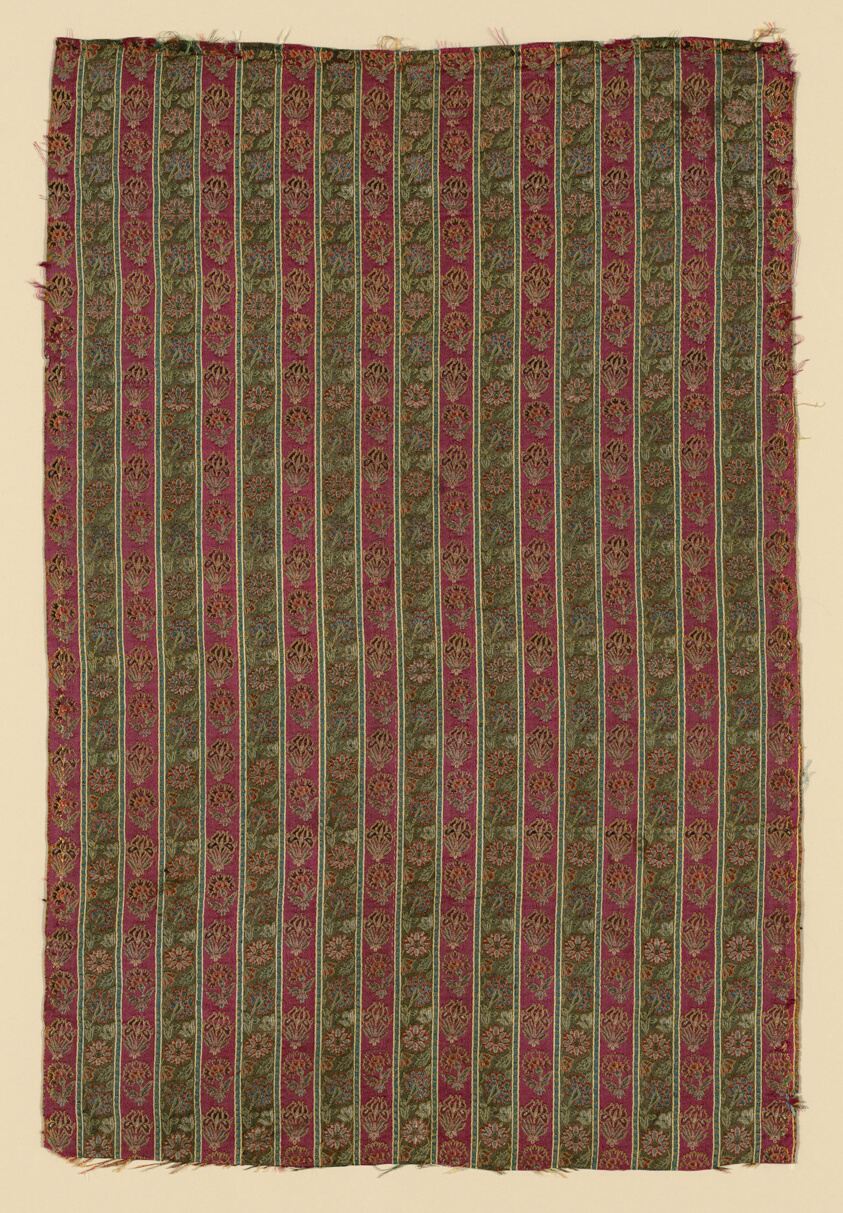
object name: Textile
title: Dress Fabric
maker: Iran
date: 18th century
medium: Silk; satin weave with with weft-faced patterning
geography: Iran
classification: textile; weaving